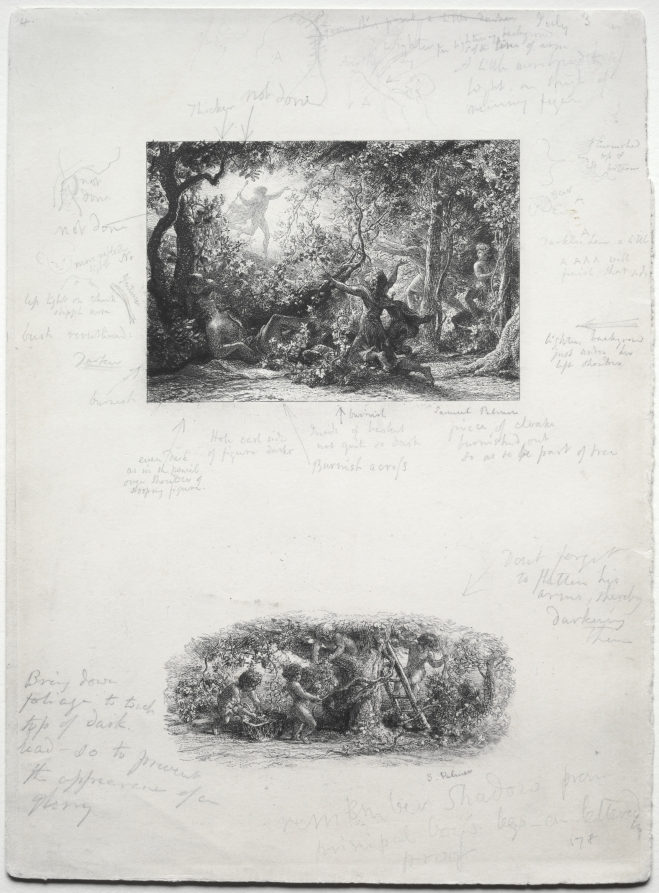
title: The Vine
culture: England, 19th century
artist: Samuel Palmer (British, 1805–1881)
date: 1852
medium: etching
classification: Print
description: This early proof (an impression created while the artist is still working on the design) by Samuel Palmer features his illustrations before the accompanying text for Songs and Ballads of Shakespeare was printed. Both images relate to a drinking song featured in act 2 of William Shakespeare’s Antony and Cleopatra, praising Bacchus, the Roman god of wine, and his products. Palmer’s handwritten notes describe modifications he was planning to make. Palmer started to work in prints late in his career but quickly became accomplished in the medium. His imagery is characterized by juxtaposing delicate textures and dramatic lights and shadows, as seen here in the contrast between the radiant Bacchus and those making and enjoying the drink.